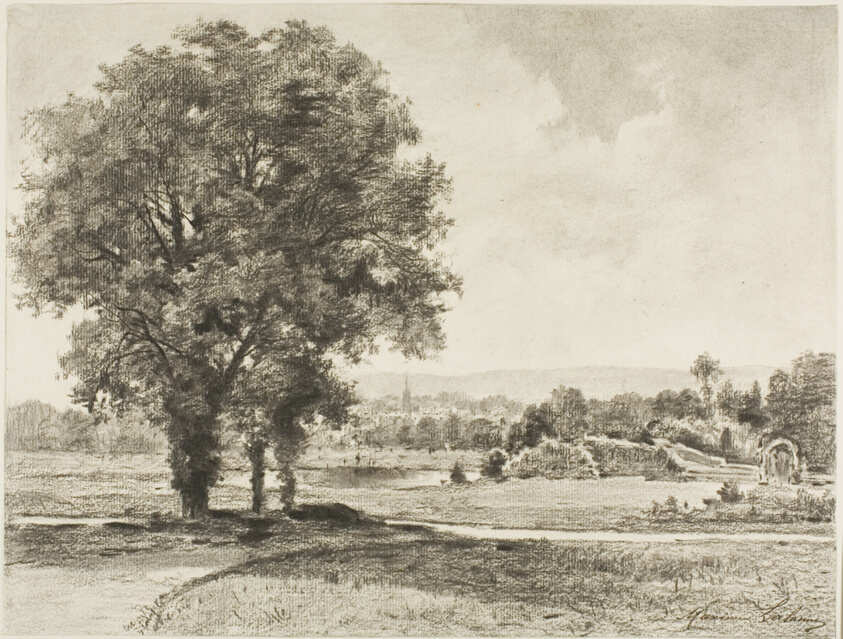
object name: Drawing and Watercolor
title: Landscape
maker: Maxime Lalanne (French, 1827-1886)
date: 1870/75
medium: Charcoal, with stumping and erasing, on ivory laid paper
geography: France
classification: charcoal; drawings (visual works); prints and drawing